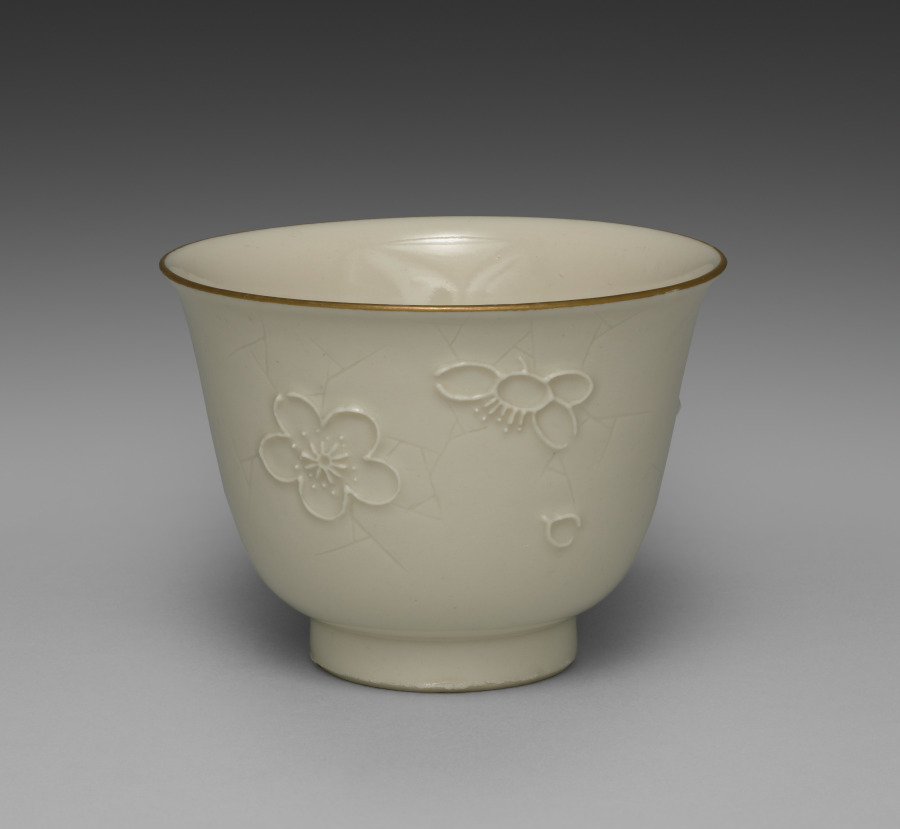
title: Drinking Cup from Dining Set with Plum Blossoms and Cracked-Ice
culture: Japan, Meiji period (1868–1912)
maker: Seifū Yohei II (Japanese, 1844–1878)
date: c. 1875–78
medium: Porcelain with molded designs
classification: Ceramic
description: Each item in this set has a delicate low-relief design of flowering plum branches over scattered, intersecting lines meant to resemble the cracked-ice surface of a frozen body of water and is signed on the base in gold pigment. While Yohei II produced many fine works in underglaze blue, like those produced by Kiyomizu Shichibei, he also made works in quite different styles later in his career, from the early 1870 s. In 1873, he was appointed purveyor to the Industrial Center of Kyoto Prefecture, a designation associated with Kyoto’s efforts to reach an international market through the port of Kobe; and from 1875 until his death, he was involved in national-level projects to present Japanese ceramics across the world. It was during this period that Yohei III was apprenticed to Yohei II, and it has been suggested that this set may in fact be an early example of Yohei III’s work, which he signed with his teacher’s name. Decorated with flowers resembling Japanese textile motifs, the set calls to mind the design of Yohei II’s pair of vases with plum blossoms in the Victoria and Albert Museum. Here, the elaborate trees created for a formal public exhibition setting have been translated into the approachable blossoms of the genteel domestic environment. While the designs are consistent across the pieces, each raised flower petal and pistil and each incised line in the ice was done by hand, so the cups, bowls, and dishes are similar yet unique. The bottoms of two boxes once identified the set’s owner, but the information has been deliberately obscured with black ink. However, inscriptions still visible appear to indicate two occasions, once at the end of July 1886 , and once again in June 1916 , when parts of the set were requested from Hokura in Niigata Prefecture. The location corresponds to a neighborhood in the present-day city of Jōetsu. The surname Tsuji 辻 also appears on a paper tag affixed to one of the box cloths. Future research may possibly reveal more about their provenance. A vase by Yohei III in a private collection combines the formal grandeur of the Yohei II vases in the Victoria and Albert Museum with the gentler design of this dining set, placing flowering plum trees against soft, scalloped-edge clouds resembling those in golden screens.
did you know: The dining wares have a creamy white coloration that the four boxes containing them identify as Korean in style.